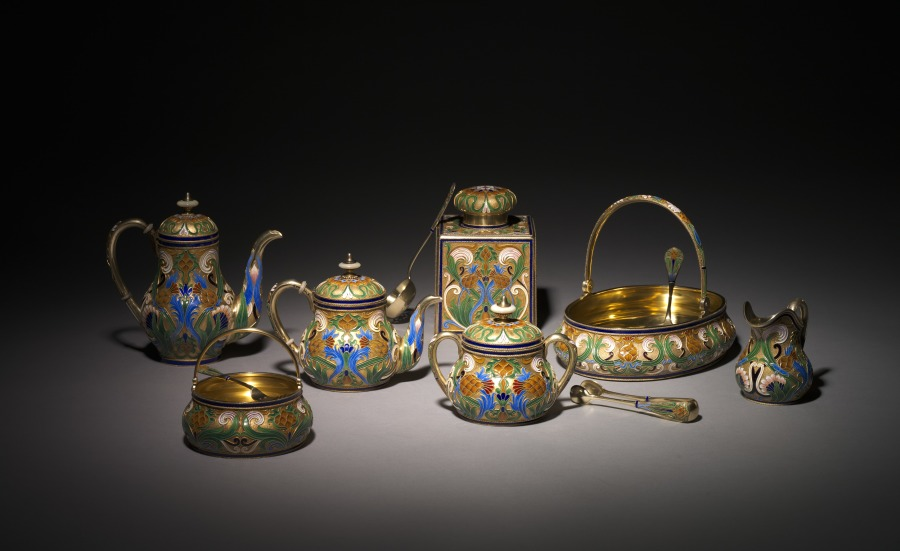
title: Tea Service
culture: Russia, St. Petersburg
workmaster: attributed to Feodor Ivanovich Rückert (Russian, 1840–1917)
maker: House of Fabergé (Russian, 1842–1918)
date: 1887–96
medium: silver gilt, opaque cloisonné enamel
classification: Miscellaneous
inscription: Various marks.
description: Fabergé’s craftsmen in Moscow, especially under the watchful eye of workmaster Feodor Rückert, became known for their work in the pan-Slavic or neo-Russian style, hearkening back to 17th-century motifs of Russian folk art. Often on rather conventional shapes, Rückert and his silversmiths created an explosion of color, achieved through the historic technique of cloisonné enamel in which tiny metal lines are soldered to the surface then filled with glass powders in various colors and fired to create a high gloss finish. The result is a spectacular evocation of the 17th-century originals. Far from mere copies, however, Rückert's designs, such as this tea service, employ naturalistic or abstract motifs in a thoroughly modern adaptation of a remarkable earlier period of Russian art and decoration.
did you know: This tea service still retains its large wooden presentation box.